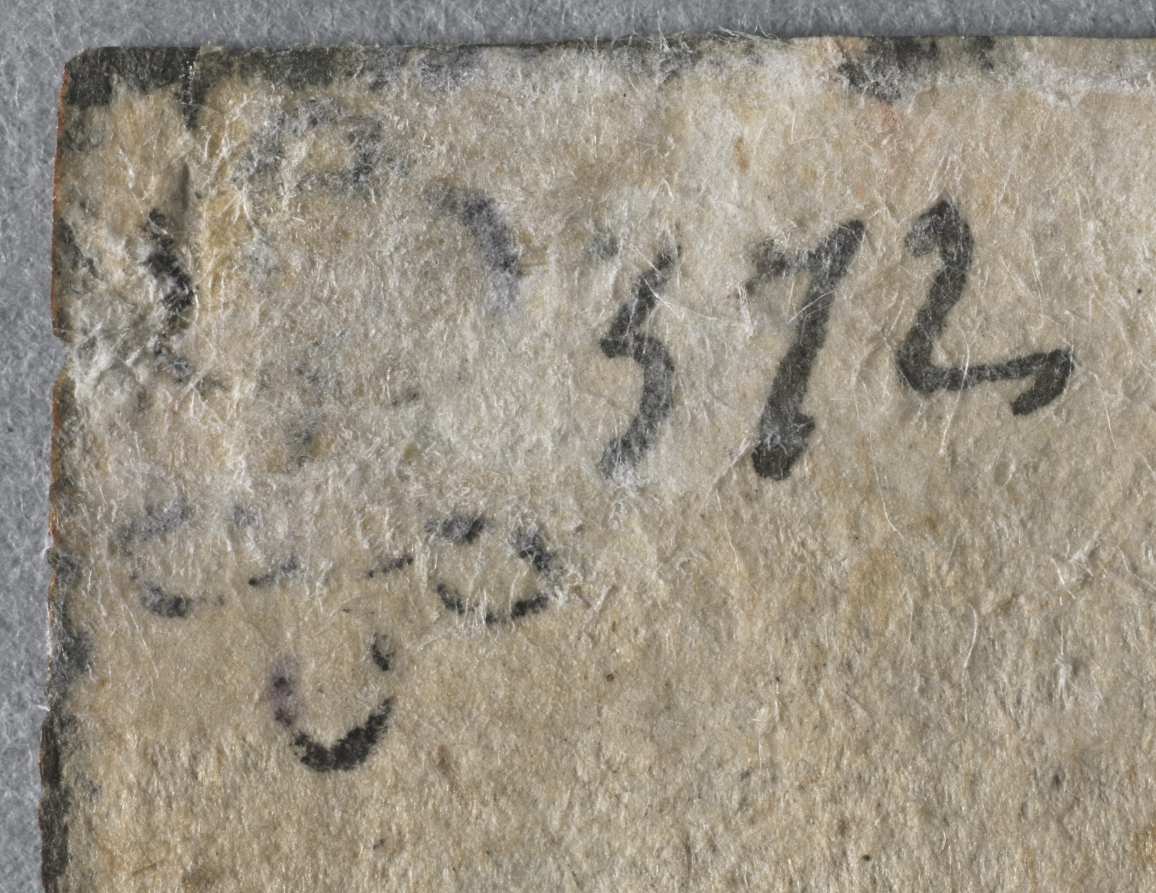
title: Allegory of Christian Belief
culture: Germany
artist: Johann Liss (German, c. 1597–1631)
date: c. 1622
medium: pen and brown ink and brush and brown wash; framing lines in pen and black ink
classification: Drawing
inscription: signed, lower right, in brown ink: Johan Liss / Mahler [illegible] / Holsati[a][masked] ; by artist, upper right, in brown ink: Alle Kunst undt widtz ist / eitel staub. / Hoch weisheidt ist ann. / Christum gelaub. ; by artist, lower right, in brown ink: Zu Rom den 19 martis Ao ["o" in superscript] 16[illegible, final two numbers abraded] ; upper left, in brown ink: + [collector's mark?]; upper right, along right edge, in brown ink: 265 [sideways] ; VERSO, upper left, in ink: 572 ; upper right, in graphite: 69 [sideways] ; center, in graphite: No. 99 al ; lower right, in graphite: Joh. Liss. [erased] ; lower left, in graphite: mj [?] ; lower left, in graphite: T5910 ; lower left, in graphite: Jah. Lys 1570-1626 ; lower right, in graphite(?): Bo. 20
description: This exceedingly rare drawing is one of only two signed sheets by Liss, who, in spite of the brevity of his career, was one of the most important German-born painters of the 17th century. Here, faith is personified as a woman with bared breasts and bare feet, symbolic of true Christian belief: plain, pure, and without artifice. She has cast aside worldly things-a crown, scepter, and book-and gazes heavenward as smoke wafts from an urn. The long inscription indicates that the sheet is from an album amicorum, or friendship book, in which drawings, poems, and autographs were collected as souvenirs of acquaintanceships. Liss may have made the drawing to dazzle an influential recipient with his inventive interpretation of a traditional religious subject.